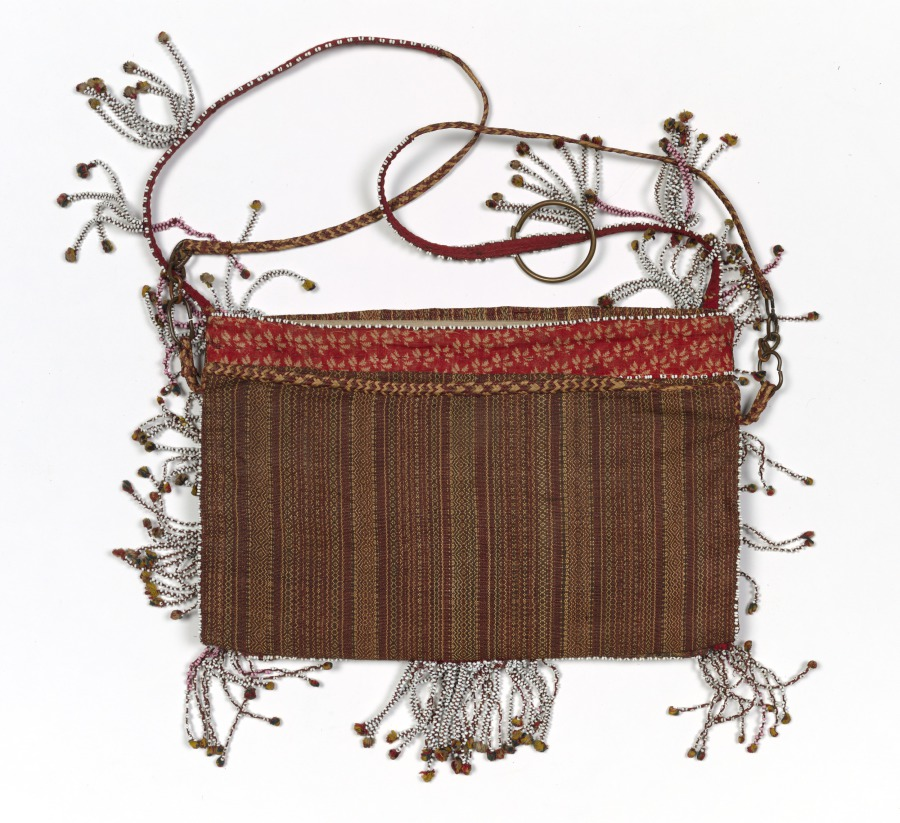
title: Backpack (Bagobo people)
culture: Philippines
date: early 1900s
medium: Handwoven abacá cloth, printed cotton cloth, abacá fiber (braided/plaited cordage), glass beads, metal sequins, metal rings, fiber tassels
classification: Textile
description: This backpack for men is constructed from a single length of handwoven abacá cloth, woven in a warp-faced plain weave with supplementary weft patterning. The beadwork uses glass beads of various colors arranged in geometric bands and diamond motifs characteristic of the Bagobo people. Two shoulder straps, constructed from braided abacá fibers overlaid with cotton cloth and embellished with beads and metal sequins, are attached through metal rings.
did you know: Ethnographic photographs document backpacks like this one being worn by Bagobo men in ceremonial or formal contexts.